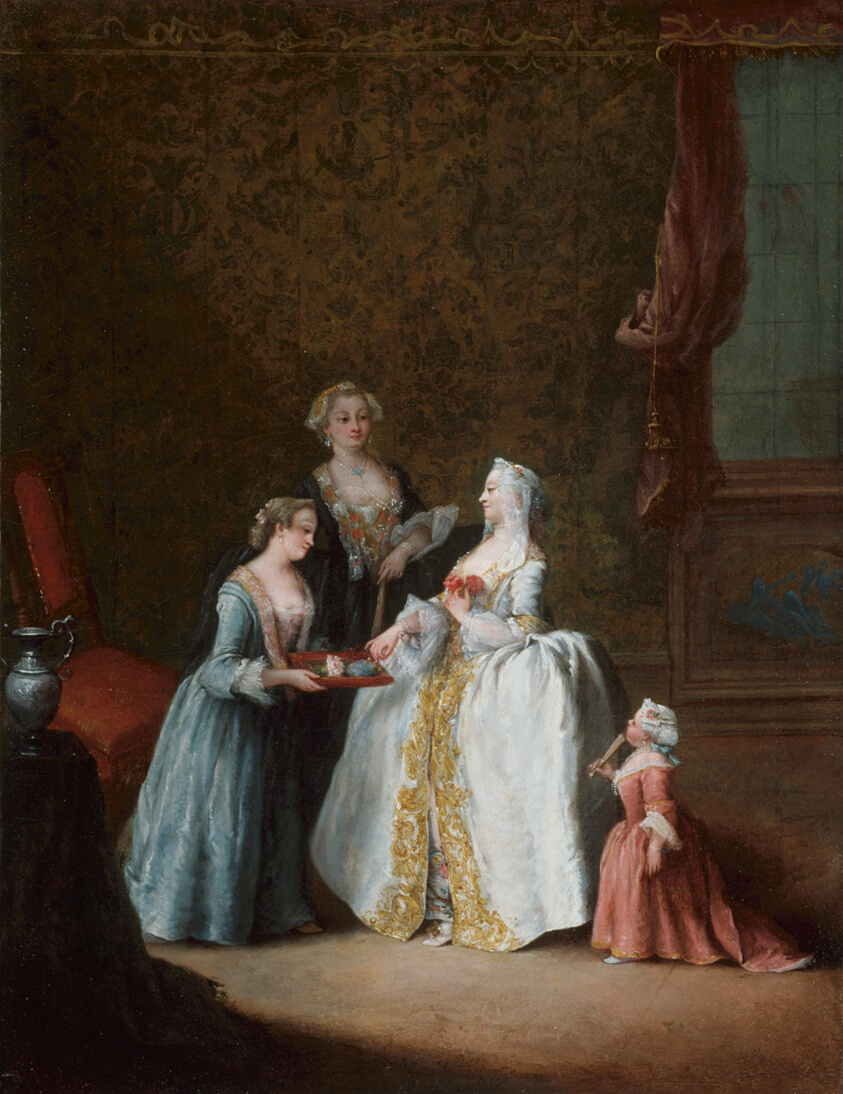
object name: Painting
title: Lady at Her Toilette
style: 18th Century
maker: Pietro Longhi (Italian, 1702–1785)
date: Late 1740s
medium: Oil on canvas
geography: Italy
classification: oil on canvas; paint; oil paintings (visual works); Italian; painting; european painting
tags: women, chair, curtains, dresses, fashion, interior, luxury, nobility, vase, wealth, window, woman